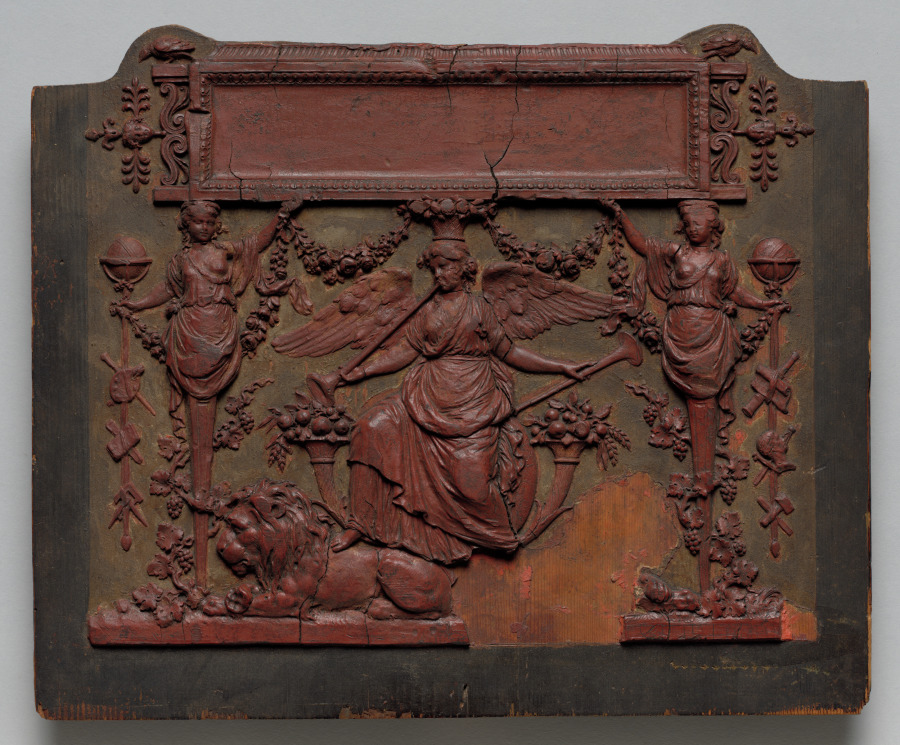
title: Model for the Lower Part of a Gilt Bronze Furniture Mount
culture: France, 19th century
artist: firm of Louis Auguste Alfred Beurdeley (French, 1808–1882)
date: c. 1867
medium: red wax relief on wood panel painted blue green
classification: Furniture and woodwork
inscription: Inscribed on rear in pencil: "---tion Beurdeley"; and in red paint: "42(.?) 207.327."